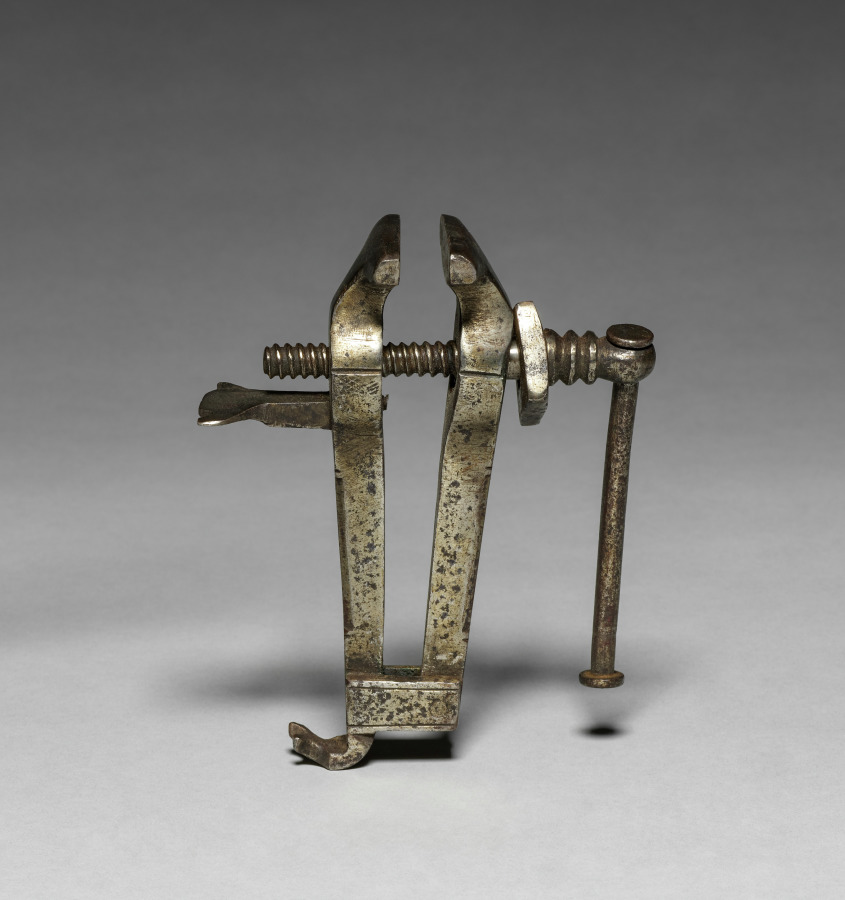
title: Hand Vice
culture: Europe, 17th-18th century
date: 1600s–1700s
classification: Tool